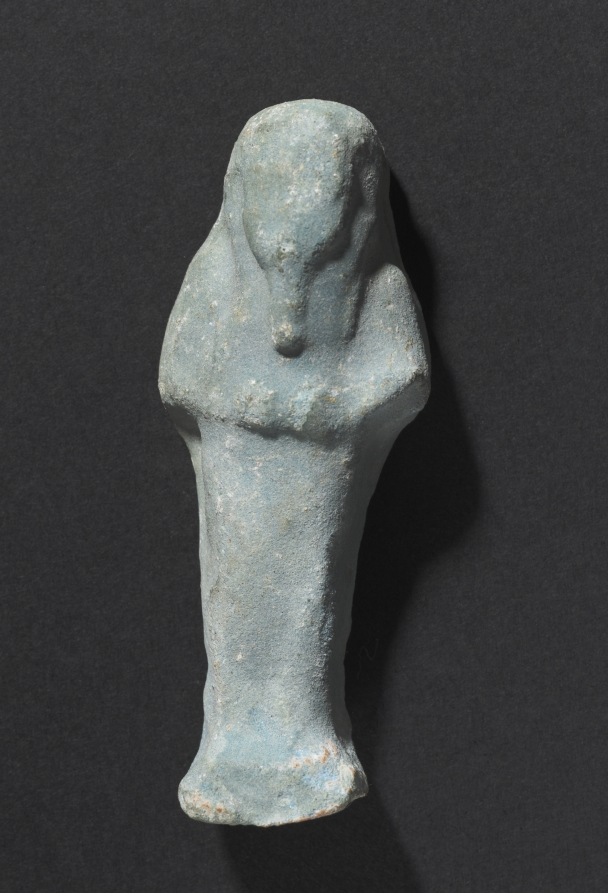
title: Shawabty of Ditamenpaankh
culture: Egypt, Late period (715–332 BCE), Dynasty 25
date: 715–656 BCE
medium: terracotta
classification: Funerary Equipment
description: High demand for shawabtys in the Late Period, a time when as many as 400 or more shawabtys were placed in the tomb with the deceased, gave rise to a specialized container for storing them: the shawabty box. This example is inscribed for the lady of the house, Ditamenpaankh, and was probably one of a pair originally made for her. The single-masted boat on the box's lid is perhaps an allusion to the pilgrimage of the deceased to the holy city of Abydos, the cult city of Osiris, king of the dead. The shawabtys inside are crude, mass-produced examples cast in an open mold. Made of terracotta, their blue paint imitates more costly shawabtys made of faience. As for the shawabty spell, it has been removed from its traditional location on the shawabty's front and relocated onto the sides of box, where it needed only to be written once, thus expediting production.